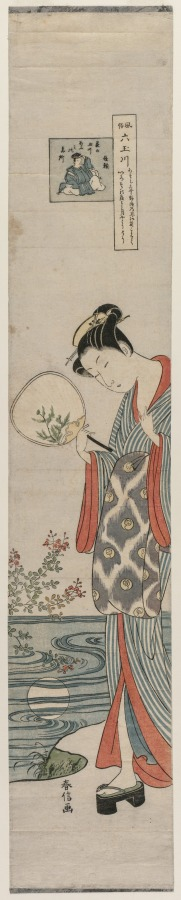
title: Woman (Bijin) Looking at the Moon's Reflection, from the series Mu Tamagawa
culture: Japan, Edo period (1615–1868)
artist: Suzuki Harunobu (Japanese, 1724–1770)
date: mid-1700s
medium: Woodblock print; ink and color on paper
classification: Print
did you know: Pillar prints, or hashira-e (柱絵), are long and narrow Japanese woodblock prints originally intended to decorate wooden pillars.